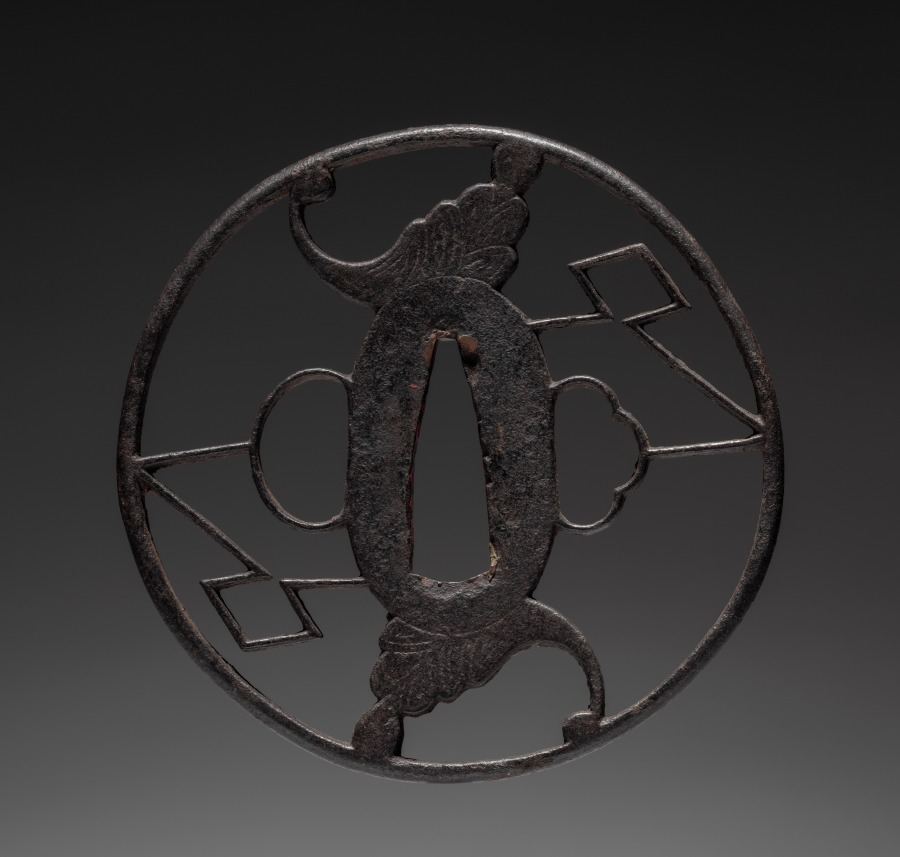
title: Sword Guard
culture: Japan, Edo period (1615–1868)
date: early to mid-1800s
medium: iron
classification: Arms and Armor